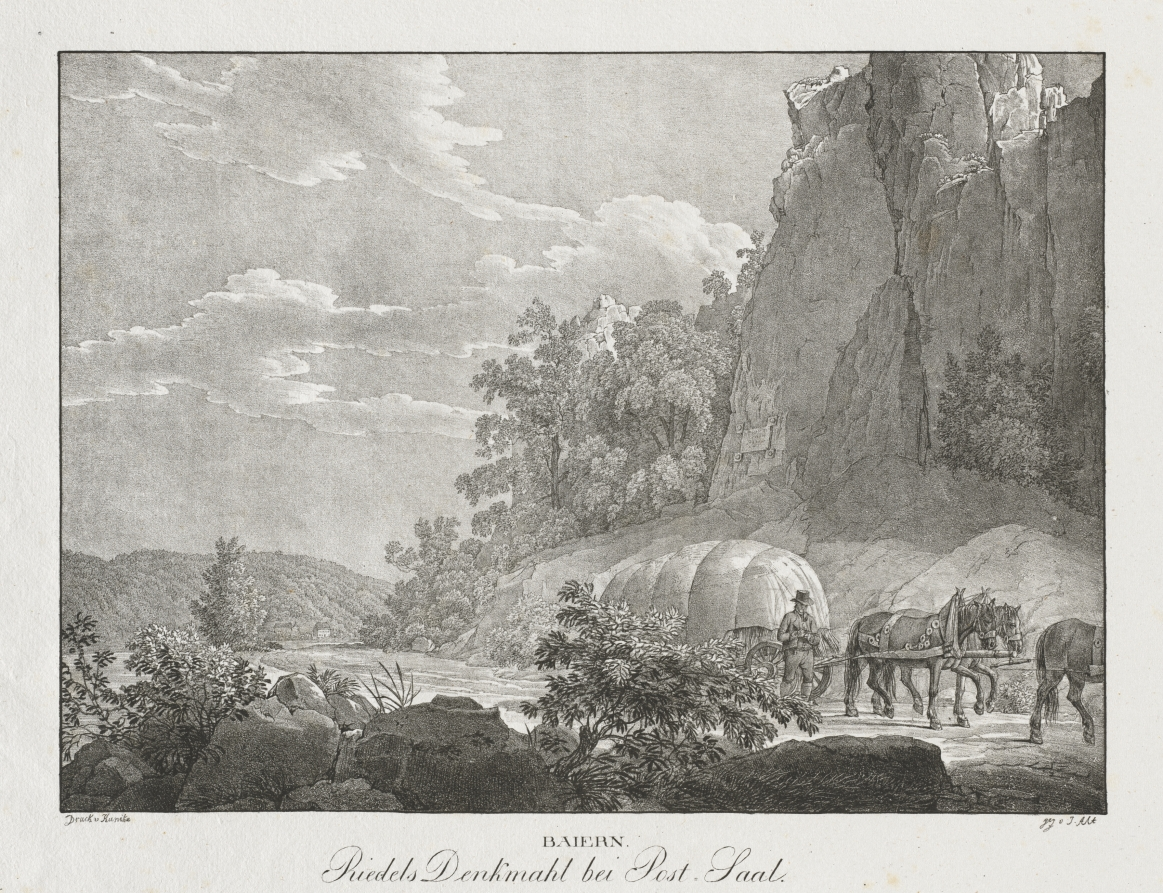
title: Baiern, Riedels Denkmahl bei Post-Saal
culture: Austria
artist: Jakob Alt (Austrian, 1789–1872)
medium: lithograph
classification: Print